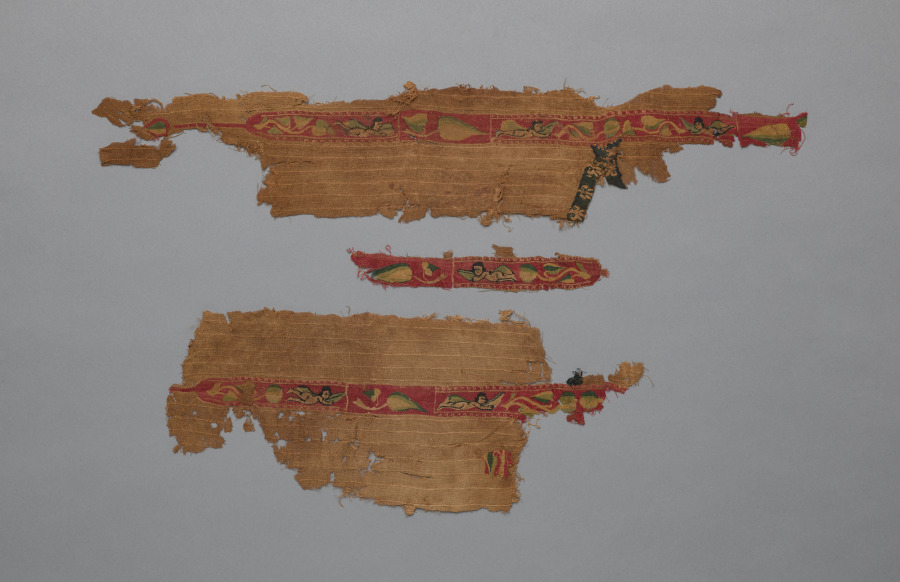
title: Fragments from a Tunic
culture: Egypt, Umayyad period (661–750)?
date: 600s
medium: tabby weave, inwoven tapestry ornament; wool and linen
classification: Textile